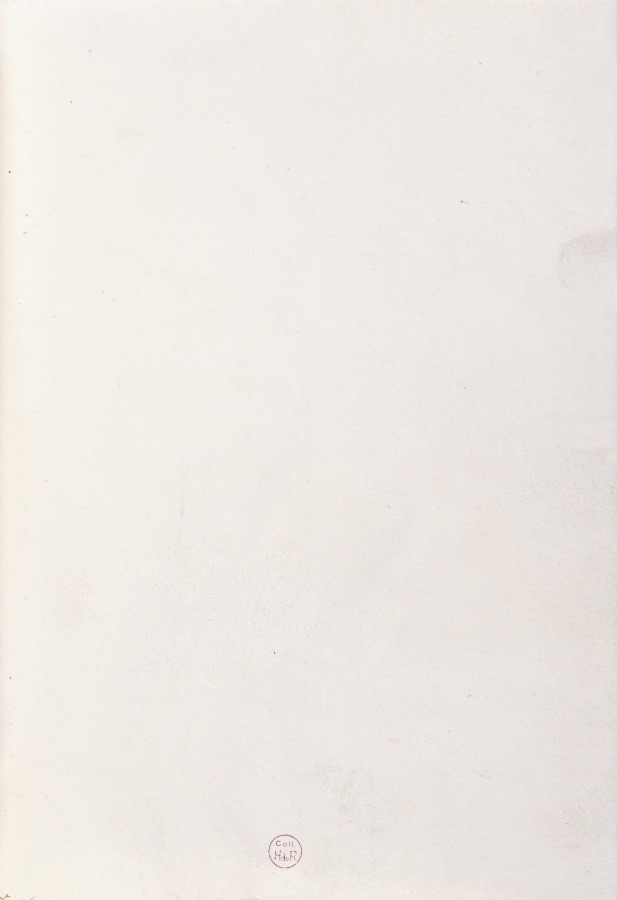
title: Hours of Queen Isabella the Catholic, Queen of Spain: Fol. 280v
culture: Flanders, Ghent and Bruges, late 15th century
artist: Master of the First Prayerbook of Maximillian (Flemish, c. 1444–1519)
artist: and Associates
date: c. 1500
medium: ink, tempera, and gold on vellum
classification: Bound Volume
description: This manuscript was illuminated by a circle of at least five highly organized manuscript painters active in the Flemish cities of Ghent and Bruges. The principal illuminator was Alexander Bening, who painted the majority of the book's miniatures. Manuscripts produced by this circle of artists are renowned for the decoration of their borders, which typically feature a rich variety of realistically-painted flowers, birds, and butterflies. This prayer book, called a book of hours, was intended not for a cleric, but for the private devotions of a lay person-in this case, Isabella the Catholic, Queen of Spain (1451-1504). Isabella's coat of arms embellishes the book's frontispiece. It is unlikely that the book was commissioned by the Queen herself; rather, she probably received it as a diplomatic gift from someone courting her patronage, perhaps Cardinal Francisco Jimenez de Cisneros. A Franciscan friar, Jimenez was dependent upon Isabella for his advancement, first to the post of Queen's confessor in 1492, and then to Archbishop of Toledo in 1495.